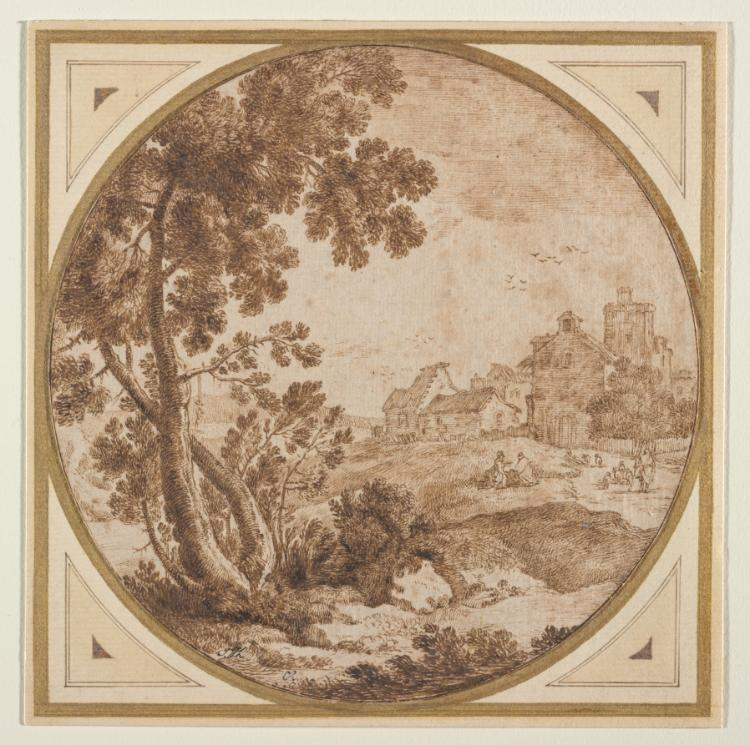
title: Landscape with Buildings and Figures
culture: Italy, 17th century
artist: Onorio Marinari (Italian, 1627–1715)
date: second half 1600s(?)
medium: pen and brown ink; framing lines in brown ink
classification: Drawing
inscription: RECTO OF SECONDARY SUPPORT, in top half, in graphite: CR Collection Charles Rogers 1711 -1784 / J. Th '' John Thane 1747 - 1818 ; center, in black ink: acheté à Londres / Onorio Marinari ; lower right, in black ink: vv/ lower center, in graphite: Onorio Marinari